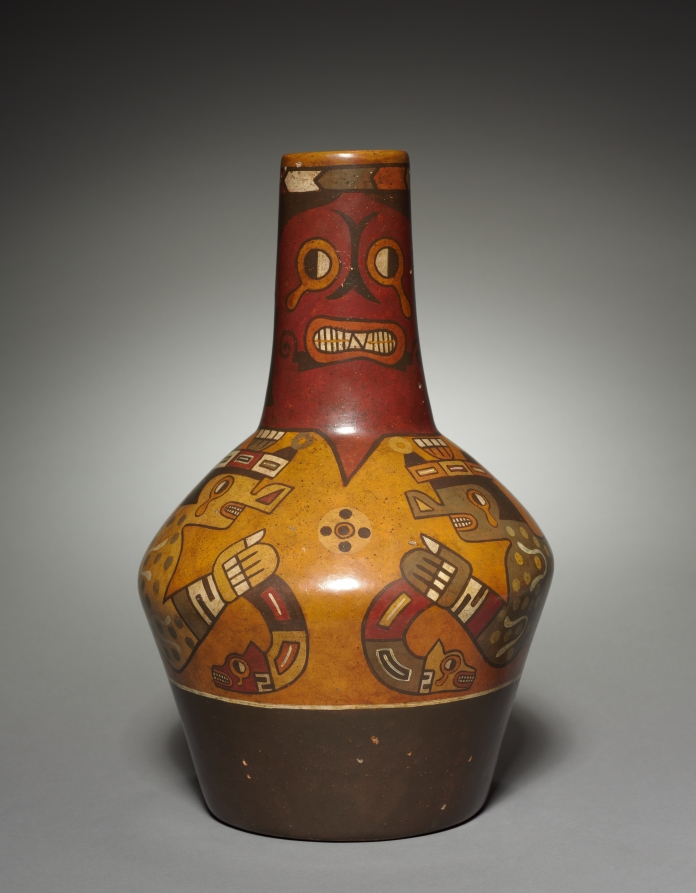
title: Vessel (modern version of a Wari-style vessel)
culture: Peru, modern, 20th century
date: before 1955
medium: pottery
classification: Forgery